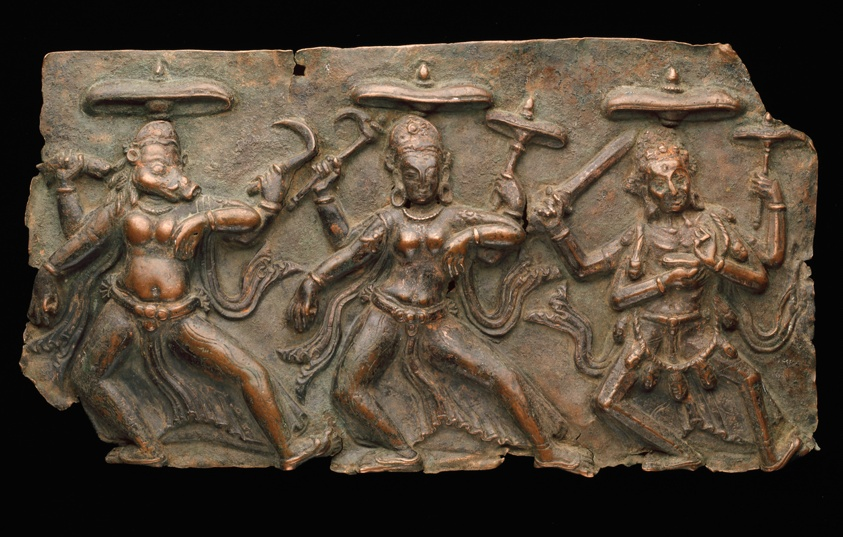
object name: Sculpture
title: Fragment of a Plaque with Dancing Mother Goddesses Varahi, Kaumari and Chamunda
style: Himalayan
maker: Nepal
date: c. 10th/11th century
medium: Copper repoussé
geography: Nepal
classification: copper; asian art; metal; sculpture